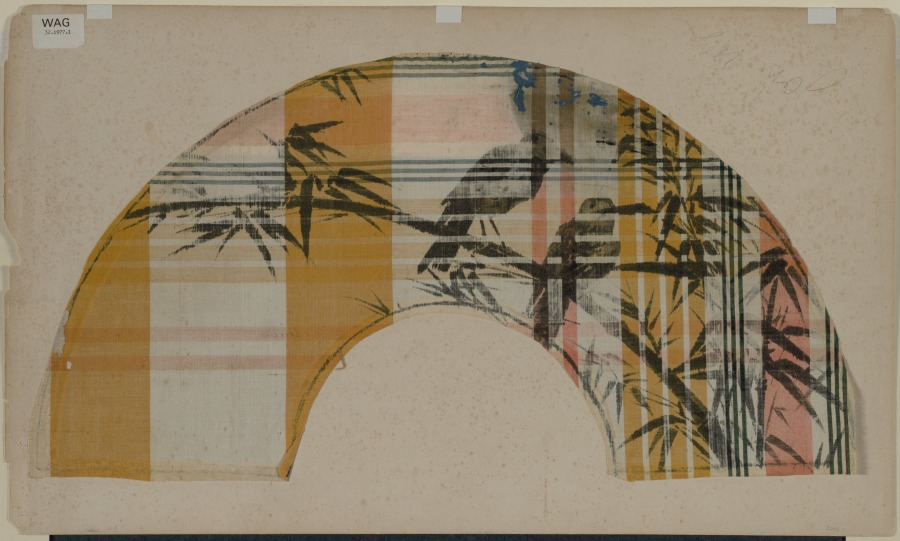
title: Fan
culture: France, 19th century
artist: Henri Charles Guérard (French, 1846–1897)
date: c. 1890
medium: black ink, watercolor, and tinted metal leaf on patterned fabric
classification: Drawing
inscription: signed in ink